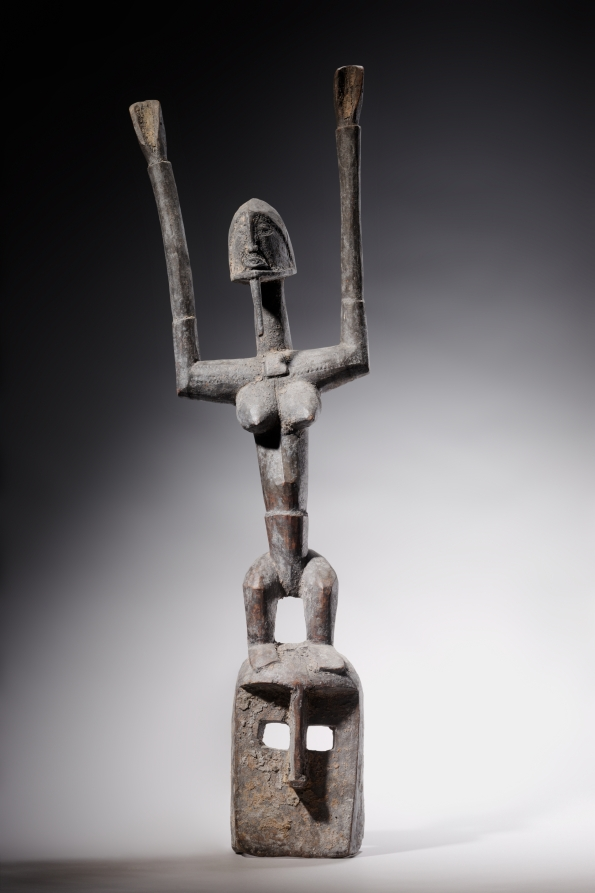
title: Face Mask with Female Figure (satimbe)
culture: Africa, West Africa, Mali, Dogon-style blacksmith-carver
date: early to mid-1900s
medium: Wood and organic materials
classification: Mask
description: Dogon masks are worn at the end-of-mourning ceremonies called dama. The masks incarnate ancestors, which can be human, animal, or vegetal. The female figure with raised arms topping this example represents the mythical character Yasigine, who played a key role in the very first sigi celebration. Held every 60 years, the sigi ceremony commemorates the arrival of death.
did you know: This mask is one of several hundred that may perform at the ceremony called dama.